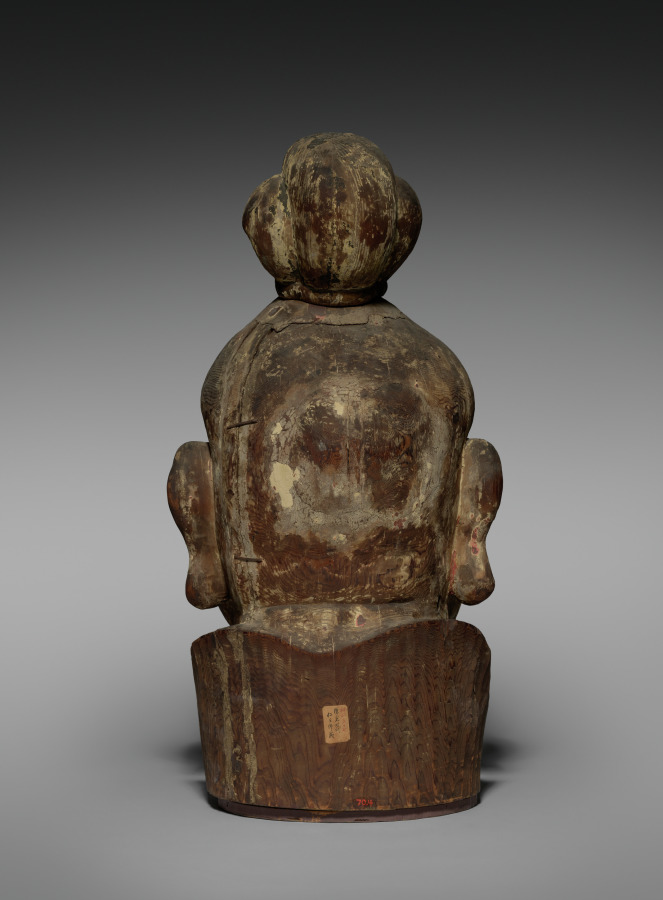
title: Head of Ni-o with Open Mouth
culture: Japan, Kamakura period (1185–1333)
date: 1200s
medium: wood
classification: Sculpture